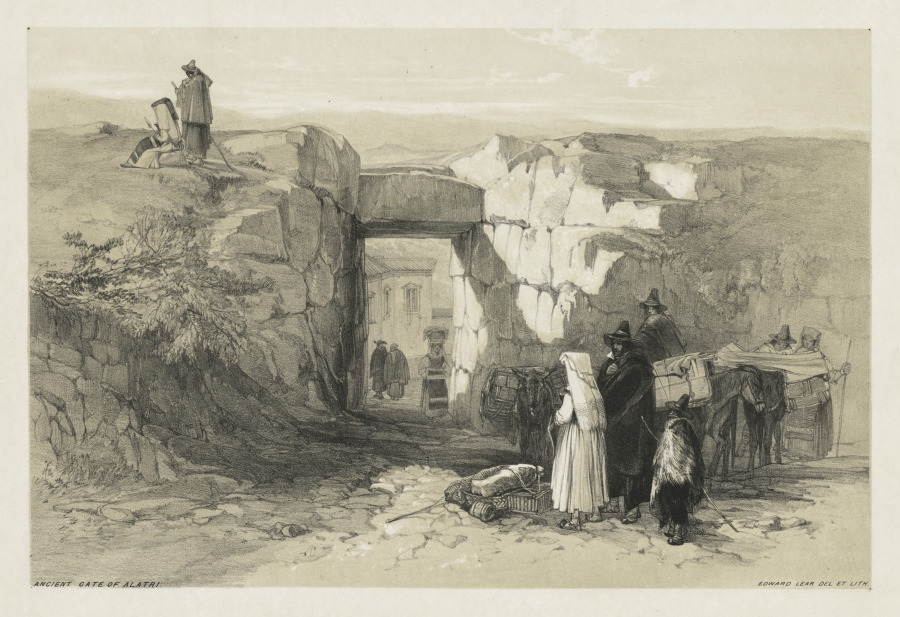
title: Views of Rome and Its Environs: Ancient Gate of Alatri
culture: England, 19th century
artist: Edward Lear (British, 1812–1888)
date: 1841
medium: lithograph with tint stone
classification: Print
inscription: In plate: Edward Lear del. et lith.